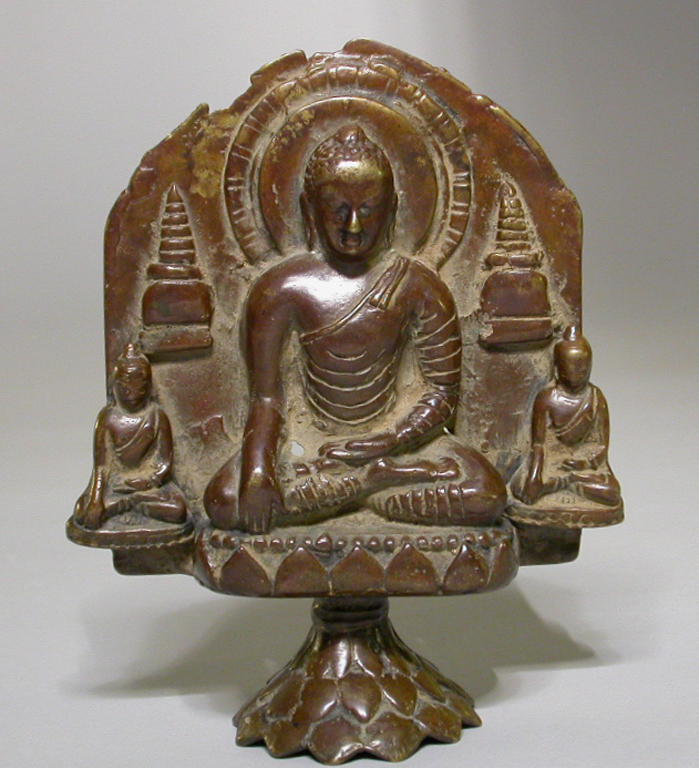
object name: Sculpture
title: Buddha Calling the Earth to Witness (Bhumisparshamudra)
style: South Asian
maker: India; Eastern India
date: Pala period, 8th/10th century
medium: Bronze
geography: Eastern India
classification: bronze; metal; sculpture; asian art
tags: Buddha